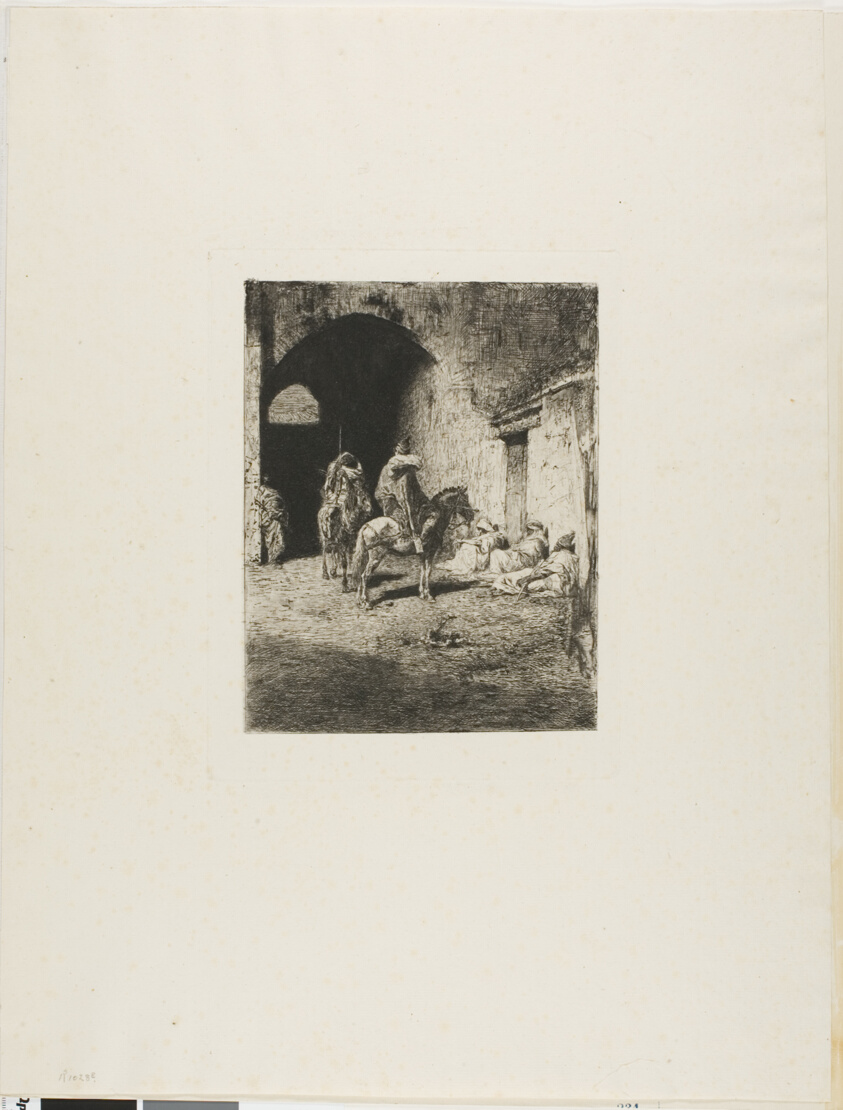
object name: Print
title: Guard of the Casbah in Tetuan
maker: Mariano José María Bernardo Fortuny y Carbó; Spanish, 1838-1874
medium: Etching on paper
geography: Spain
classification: etching; print; prints and drawing